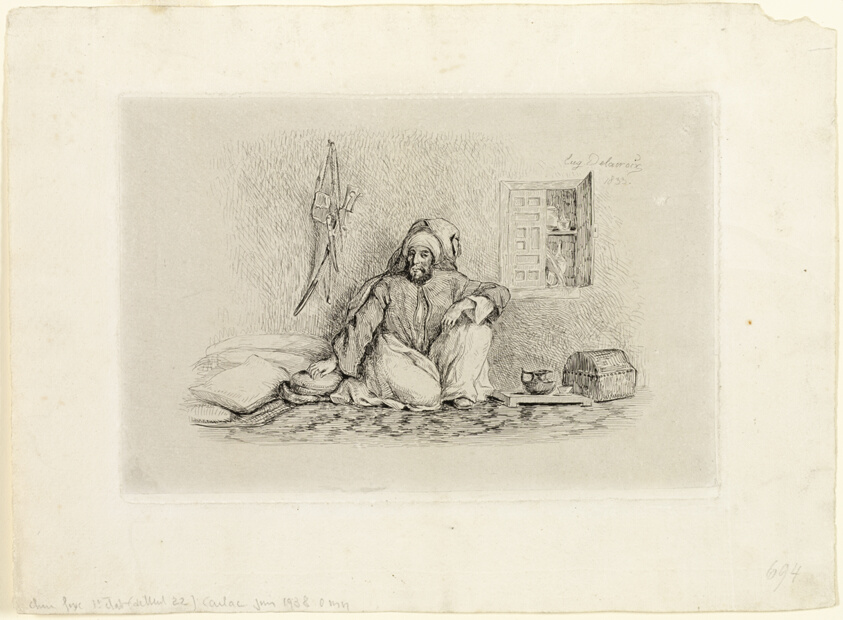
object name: Print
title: Chief Mohammed-Ben-Abou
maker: Eugène Delacroix (French, 1798-1863)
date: 1833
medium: Etching on off-white chine, laid down on white wove paper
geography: France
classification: etching; print; prints and drawing